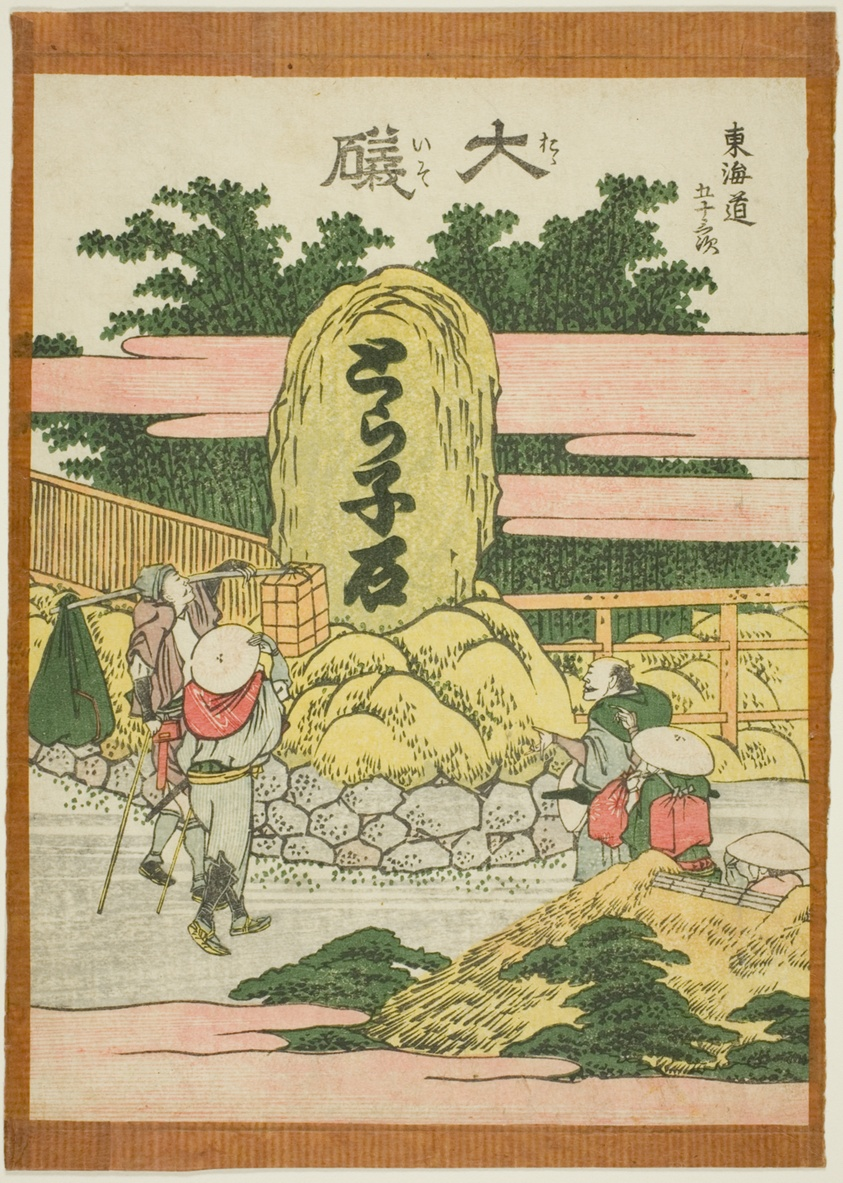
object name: Print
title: Oiso, from the series "Fifty-three Stations of the Tokaido (Tokaido gojusan tsugi)"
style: Japanese (culture or style)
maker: Katsushika Hokusai 葛飾 北斎; Japanese, 1760-1849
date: c. 1806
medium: Color woodblock print; chuban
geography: Japan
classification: woodblock print; print; asian art